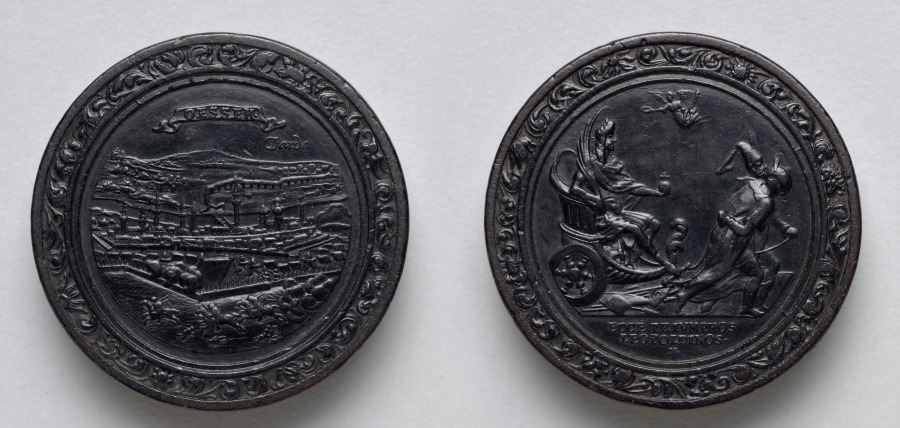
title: Gaming Piece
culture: Germany, late 17th-early 18th Century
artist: Martin Brunner (German, 1659–1725)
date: c.1700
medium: wood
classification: Furniture and woodwork